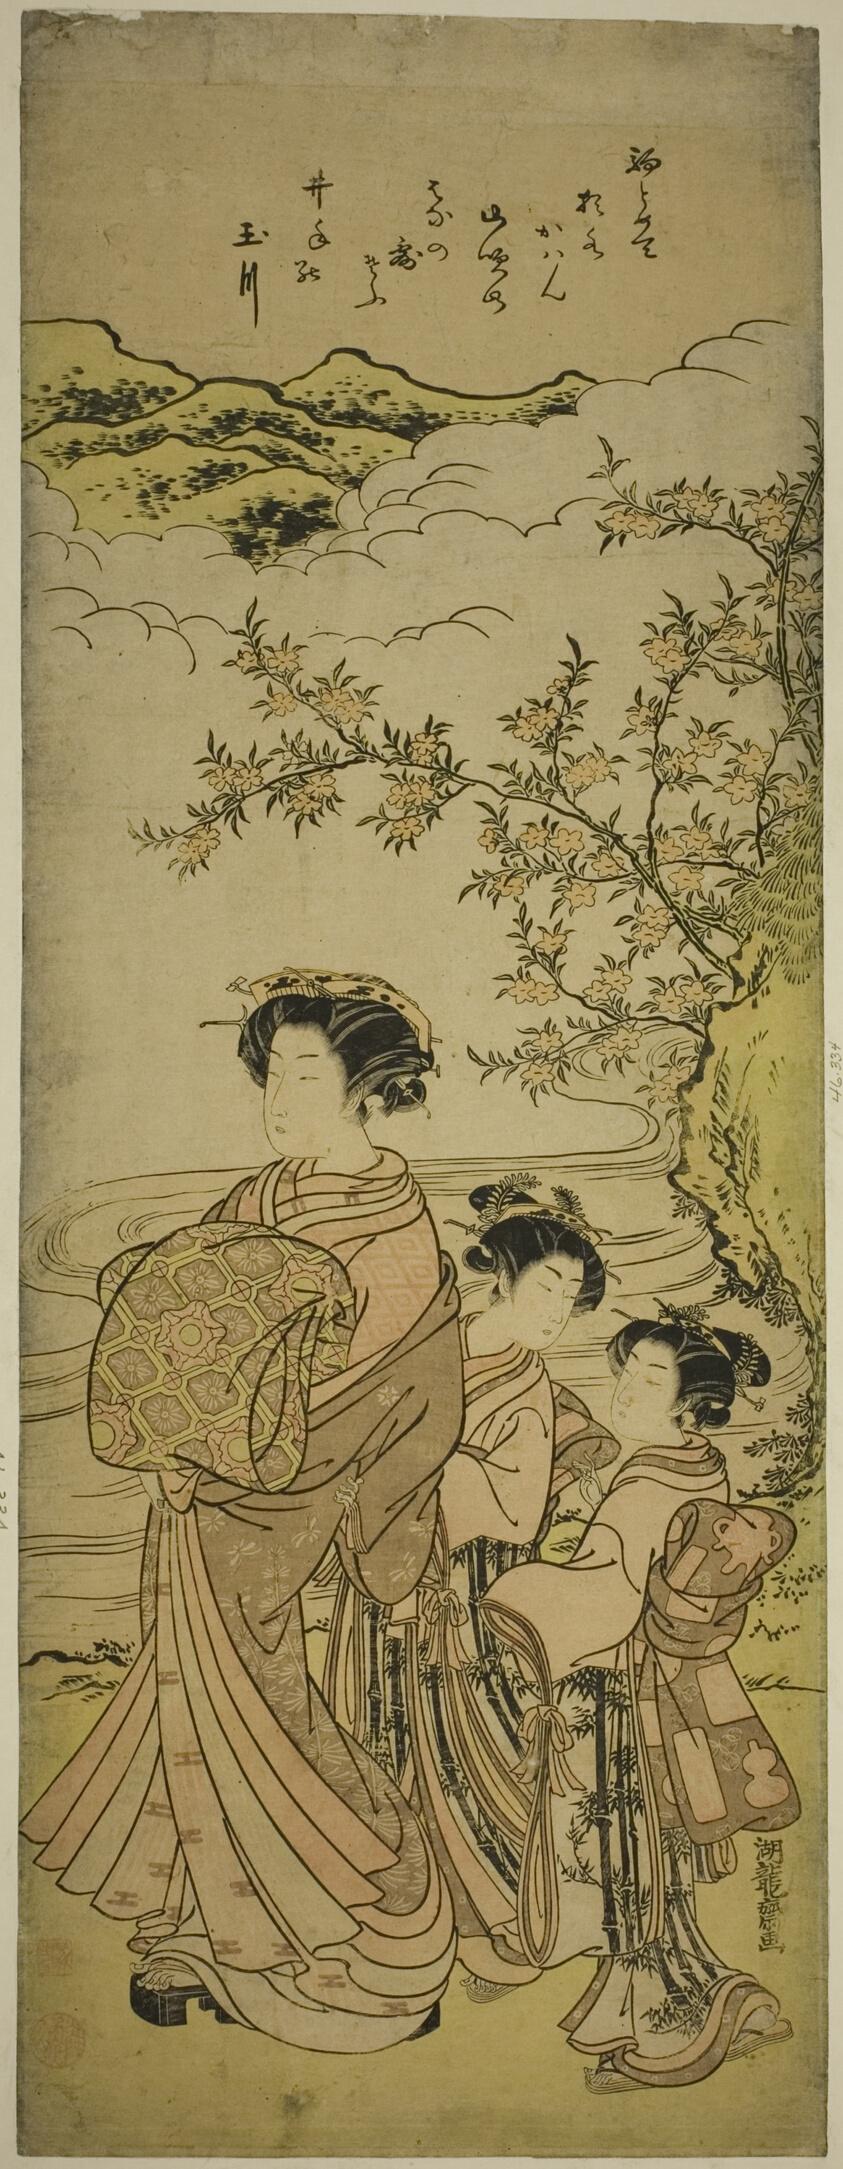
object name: Print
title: Courtesan and Two Attendants Parading by a Stream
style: Japanese (culture or style)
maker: Isoda Koryusai (Japanese, 1735-1790)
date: c. 1776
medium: Color woodblock print; vertical oban diptych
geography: Japan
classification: woodblock print; print; asian art